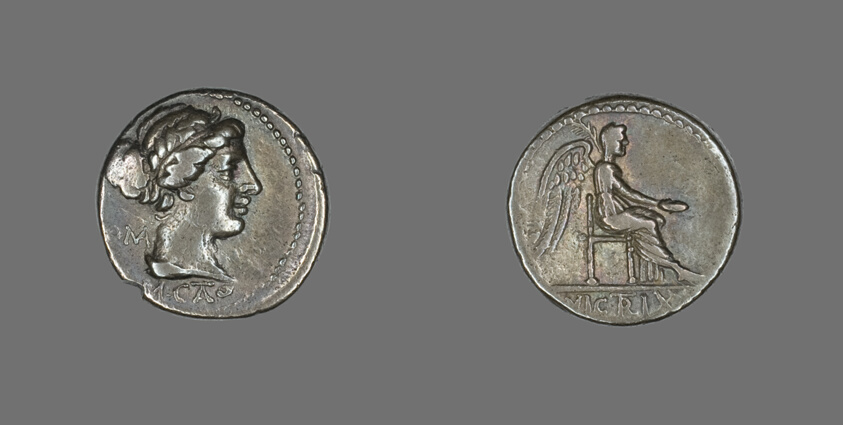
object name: Coin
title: Quinarius (Coin) Depicting Liberty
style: roman (ancient, style or period), ancient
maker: Roman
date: 89 BCE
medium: Silver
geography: Roman Empire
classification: coin; ancient art